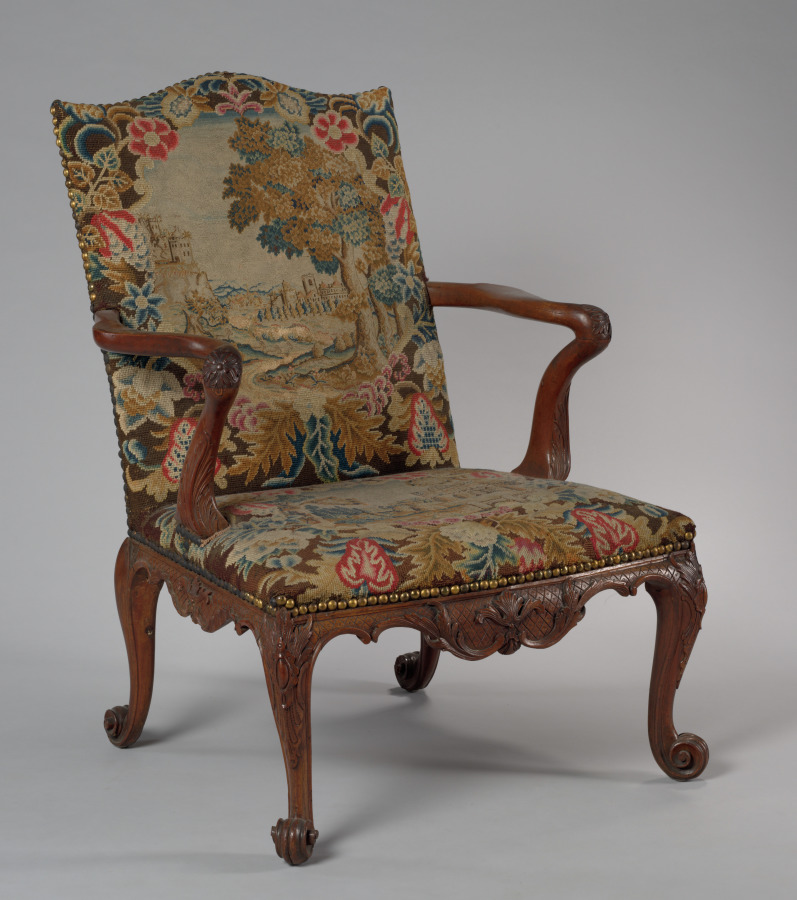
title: Armchair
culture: England, 18th century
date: 1760–1765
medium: mahogany upholstered in needlework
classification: Furniture and woodwork